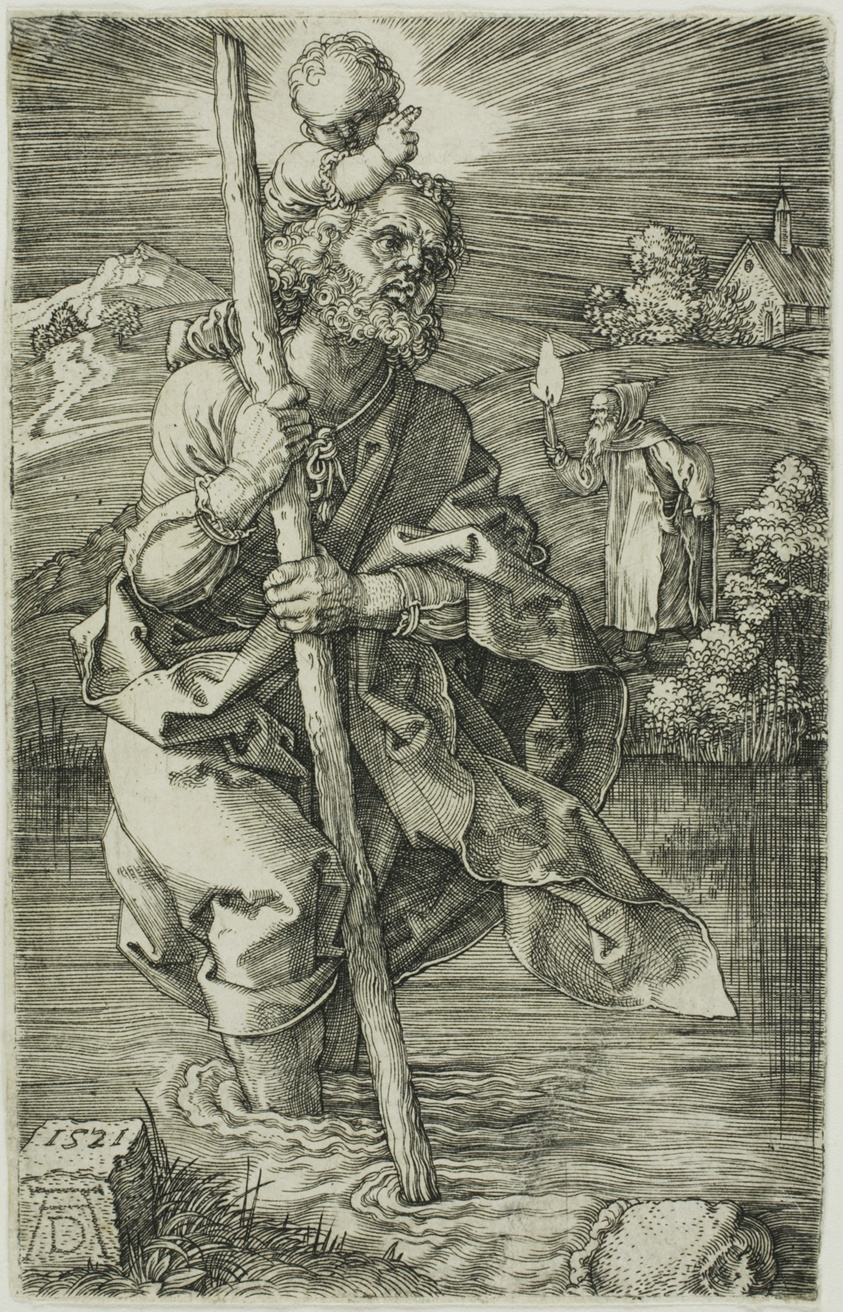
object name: Print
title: St. Christopher Facing to the Right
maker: Albrecht Dürer (German, 1471-1528)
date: 1521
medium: Engraving in black on ivory laid paper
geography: Germany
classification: engraving; print; prints and drawing; paper